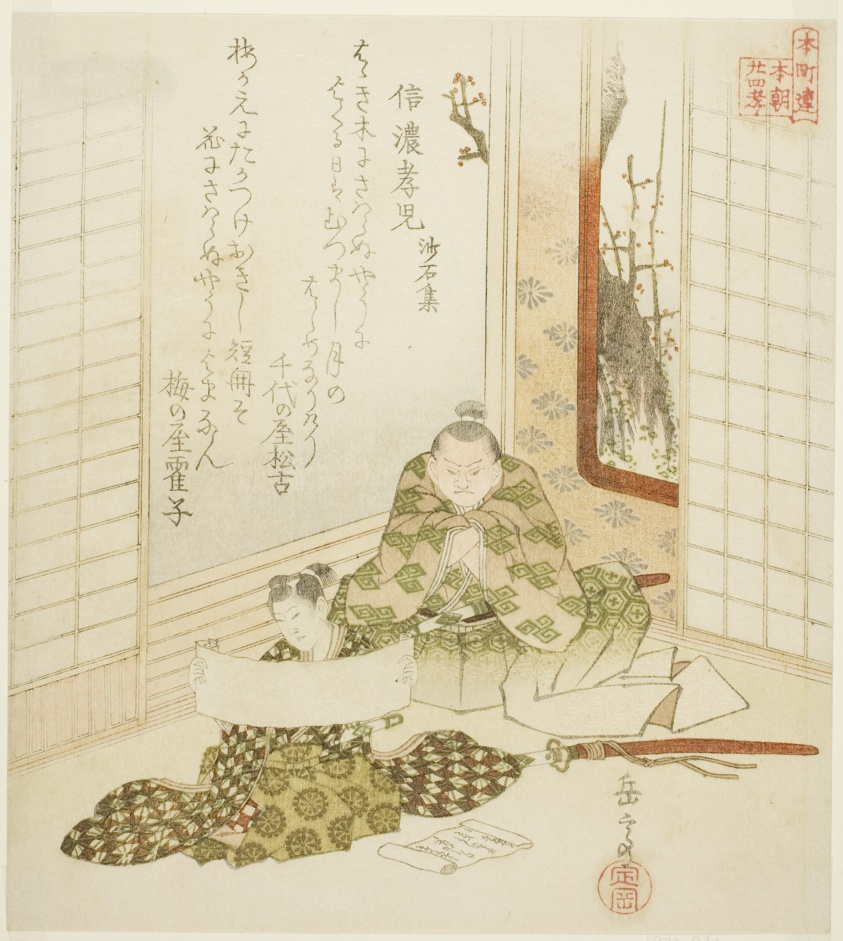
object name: Print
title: The Filial Child from Shinano Province from the Collection of Stone and Sand (Shinano koji, Shasekishu), from the series "Twenty-four Japanese Paragons of Filial Piety for the Honcho Circle (Honchoren Honcho nijushiko)"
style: Japanese (culture or style)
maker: Yashima Gakutei (Japanese, 1786 (?)-1868)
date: c. 1821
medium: Color woodblock print; shikishiban, surimono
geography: Japan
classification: woodblock print; print; asian art